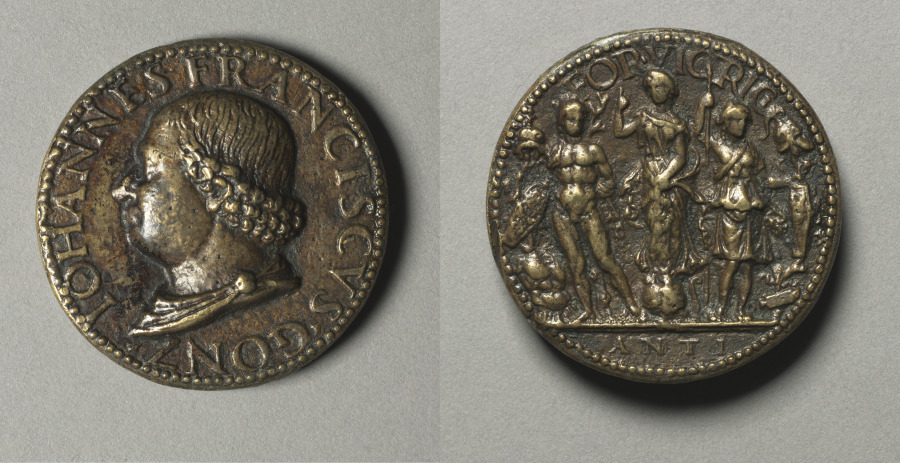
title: Portrait of John VIII Palaoelogus, Emperor of Constantinople, 1424-1428 (obverse) and (reverse)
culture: Italy, 15th century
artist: Pisanello (Italian, Ferrara, c. 1395–1455)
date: c. 1438–39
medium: lead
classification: Sculpture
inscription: obverse: IWANNHC BACI EVC KAI AVTOKPATWP PWMAIWN O A AIOA O OC [John King and Emperor of the Romans, Palaeologus]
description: The art of the medal was introduced into Italy by Pisanello, His work as a medalist began with the portrait medal of this emperor, who, in 1438, visited the Council of Ferrara.